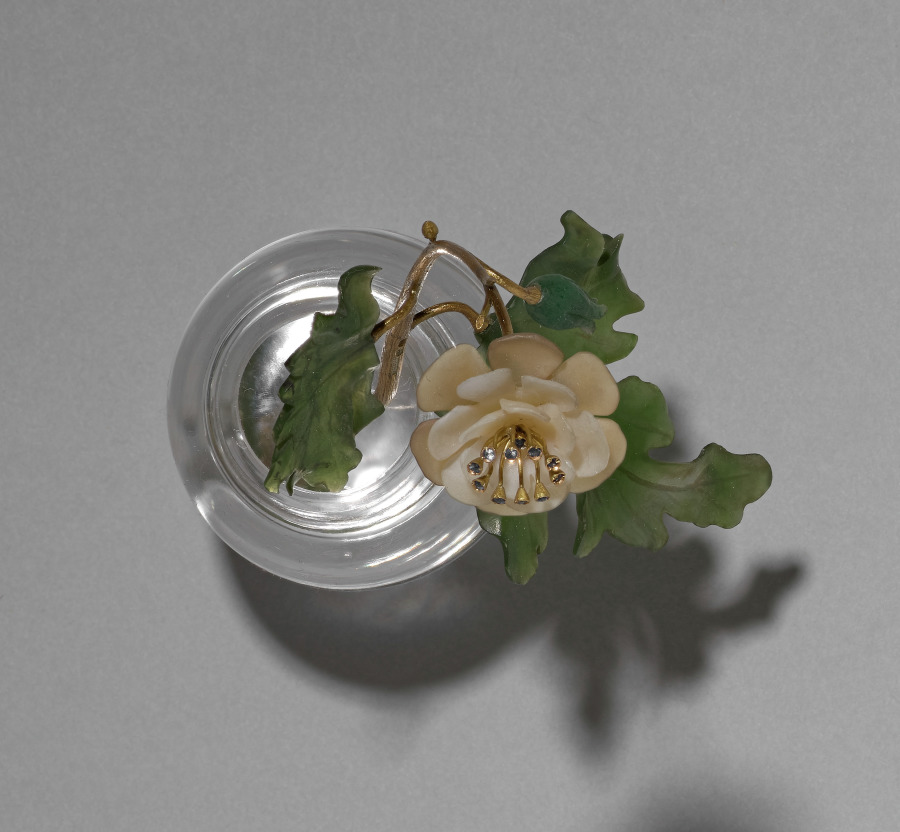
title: Flower Study of an Anemone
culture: Russia, St. Petersburg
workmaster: Henrik Wigström (Russian, 1862–1923)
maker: House of Fabergé (Russian, 1842–1918)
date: c. 1905–15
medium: mat white stone, gold, sapphires, jade, rock crystal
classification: Miscellaneous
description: This flower study depicts a wild anemone in bloom. Fabergé’s inspiration for his flower studies is said to have come from the floral brooches of precious stones that were made in the 1700s for Catherine the Great as well as from the Japanese art of flower arranging, known as ikebana. Small and delicate, Fabergé’s flower studies were given as intimate gifts to friends by the tsarina and others in the court. She also liked to take them around to wherever the imperial family was residing as a reminder of spring during the harsh Russian winters.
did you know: The stems of Fabergé’s flower studies are set into little basins carved from rock crystal to resemble pots of water.